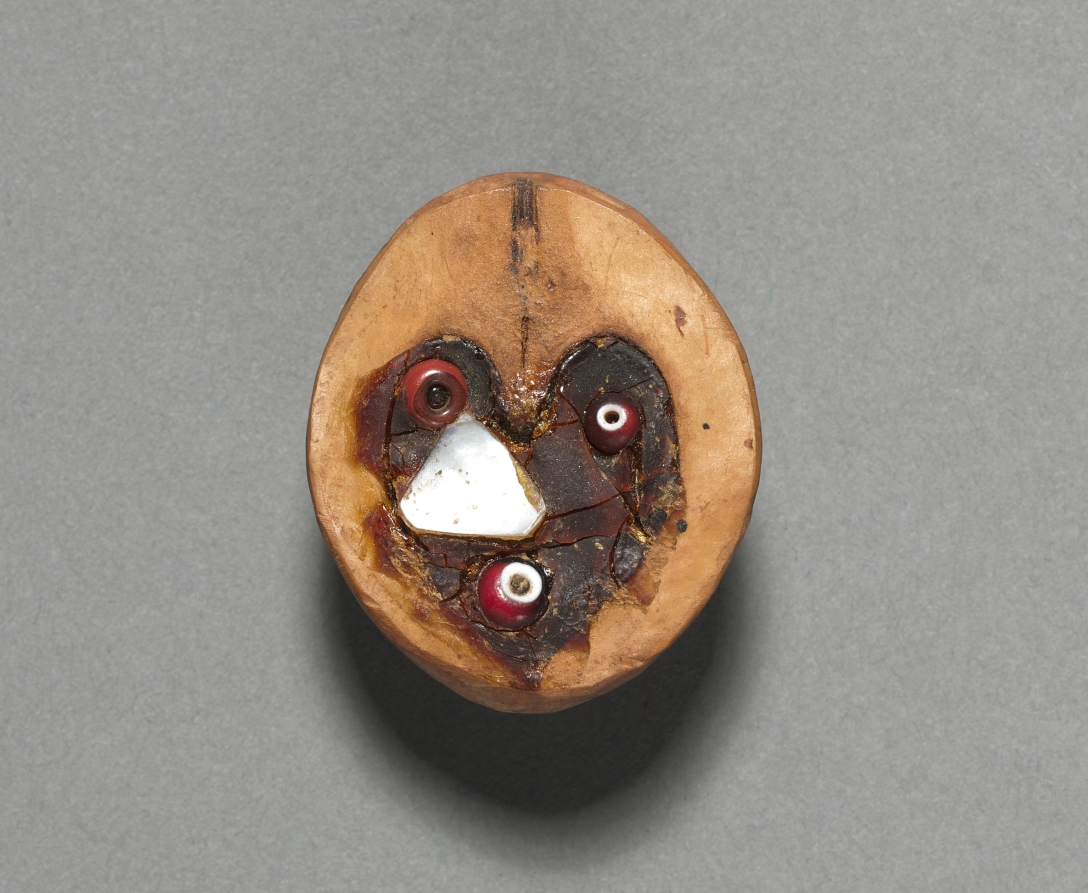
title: Gambling Dice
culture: California, Tulare, Unassigned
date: before 1917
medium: hollow shell, resin, glass beads, mica/seashell fragment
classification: Implements